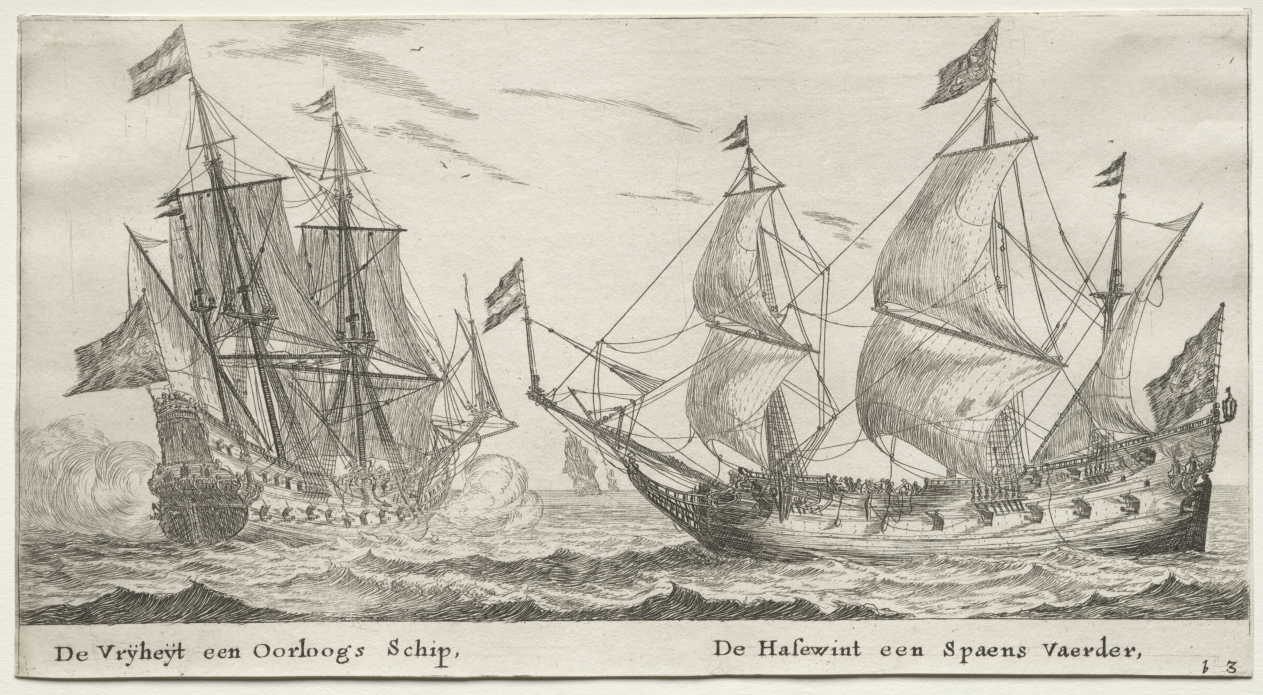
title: Various Ships and Views of Amsterdam (Verscheÿde Schepen en Gesichten van Amstelredam), Part II: The Freedom, a Man-of-War. The Wolf Hound, a Spanish Vessel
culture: Netherlands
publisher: Clement de Jonghe (Dutch, 1579–1679)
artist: Reinier Nooms, called Zeeman (Dutch, c. 1623–1664)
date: 1652–54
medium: etching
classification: Print